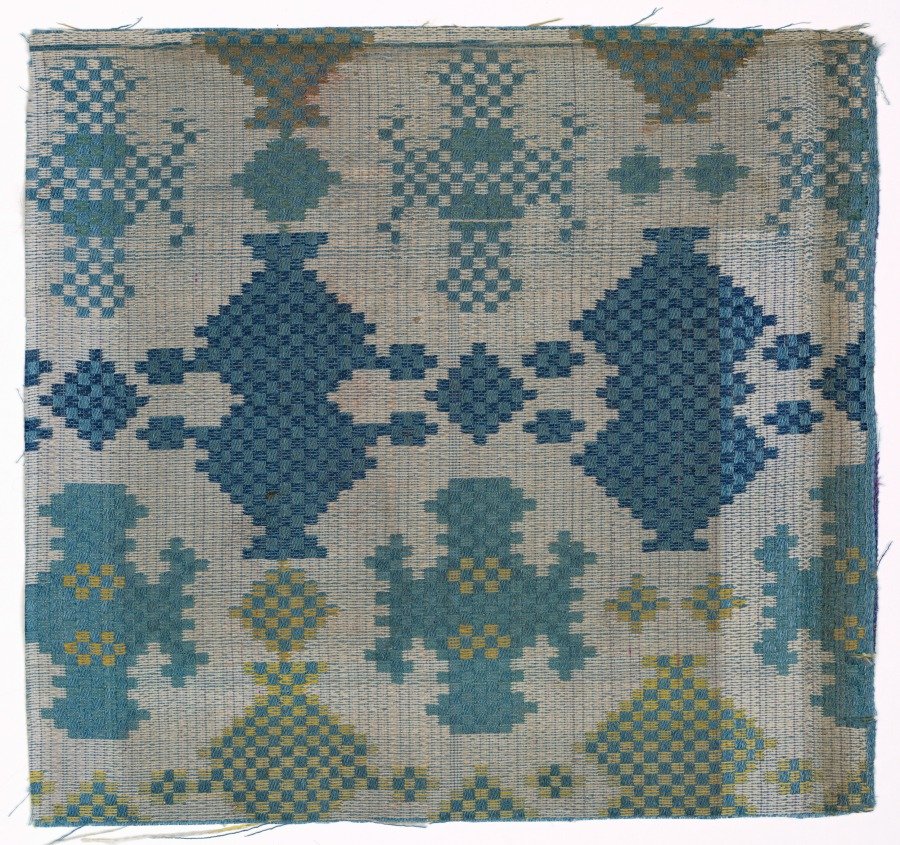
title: Fragment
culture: China, 19th century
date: 1800s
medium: silk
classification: Textile